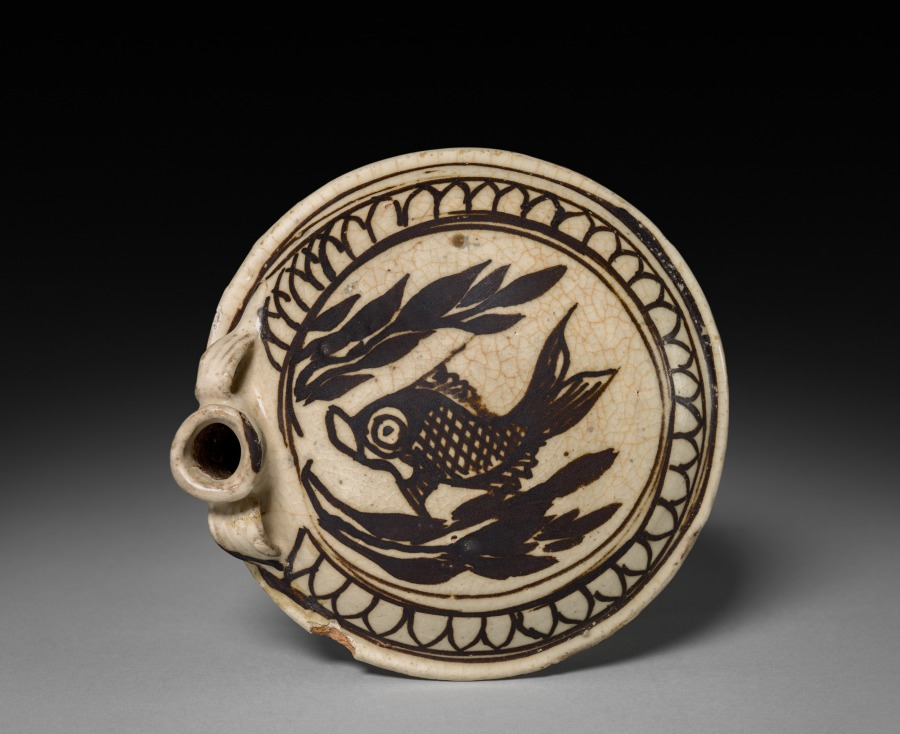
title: Water Dropper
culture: China, Yuan dynasty (1271-1368)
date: 1271–1368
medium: Stoneware, Cizhou ware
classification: Ceramic